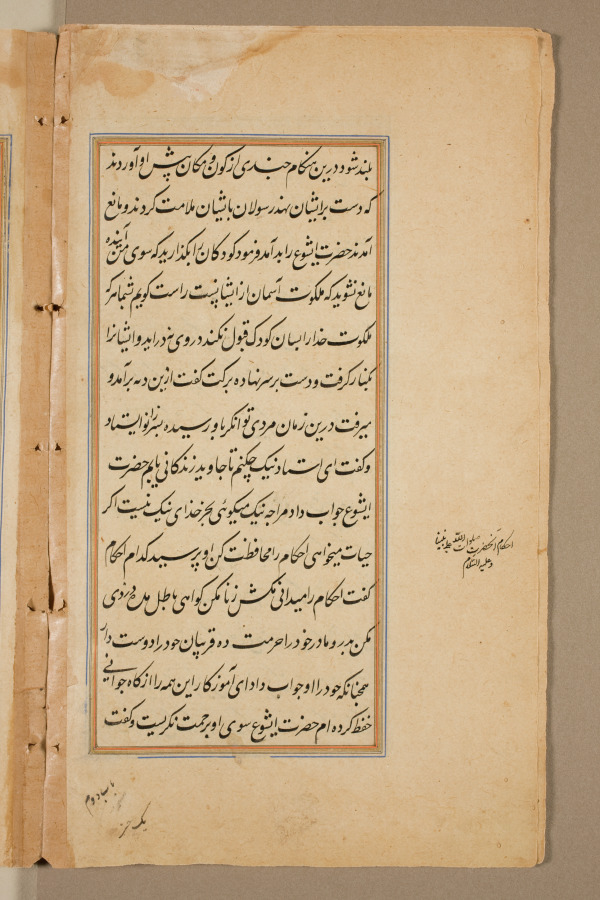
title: Text page from a Mirror of Holiness (Mir’at al-quds) of Father Jerome Xavier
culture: Mughal India, Allahabad, made for Prince Salim (1569–1627)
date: 1602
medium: Ink and gold on paper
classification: Manuscript